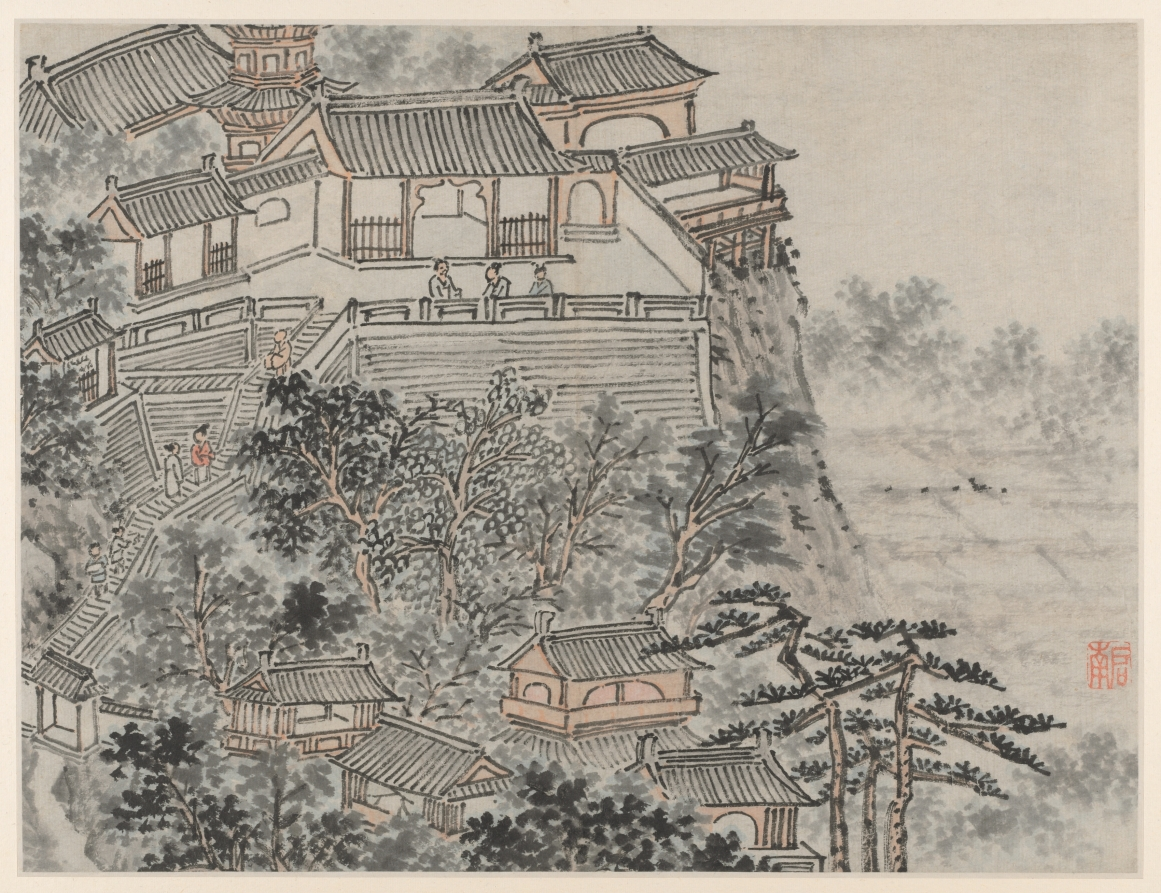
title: The Five Sages Terrace, from Twelve Views of Tiger Hill, Suzhou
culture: China, Ming dynasty (1368–1644)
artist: Shen Zhou (Chinese, 1427–1509)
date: after 1490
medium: Album leaf; ink on paper or ink and slight color on paper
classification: Painting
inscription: [印] 启南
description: Views of Tiger Hill depicts a historic site a few miles northwest of Suzhou. The scenes simulate a visit from arriving by boat at the foot of the mountain to climbing to Cloudy Cliff Monastery. Representations of the artist’s mature style, Shen Zhou included views in subtle colors in the suite of monochrome scenes. A Suzhou native, Shen Zhou was supported by family wealth and rejected an official career in favor of life as a retired scholar. Turning to painting in midlife, he is regarded as the founder of the Wu School of painting, with its center in Suzhou.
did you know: The Five Sage Terrace marks the top of Tiger Hill.